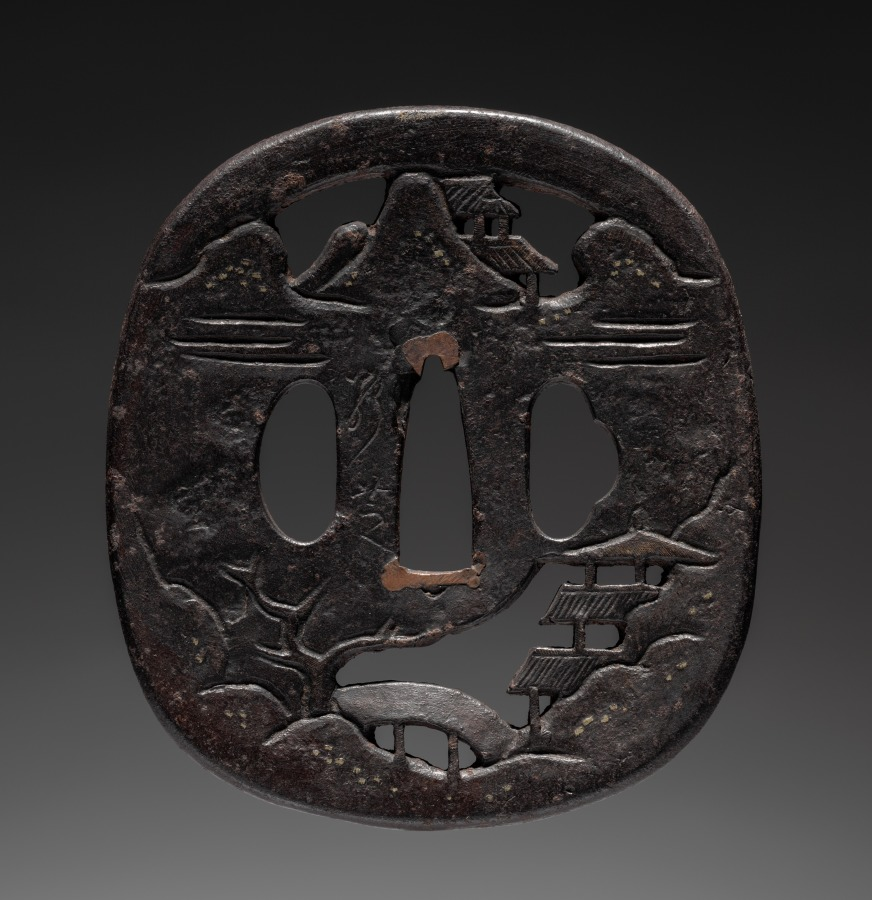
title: Sword Guard (Tsuba) with Chinese Landscape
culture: Japan, possibly Edo period (1615-1868)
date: c. 1615–1868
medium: iron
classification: Arms and Armor